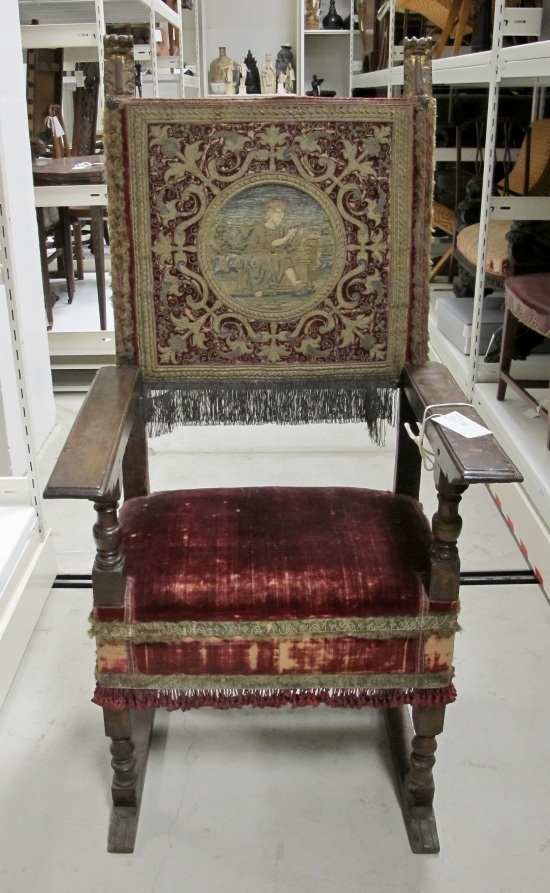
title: Armchair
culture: Italy, 17th century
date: 1600s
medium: walnut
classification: Furniture and woodwork